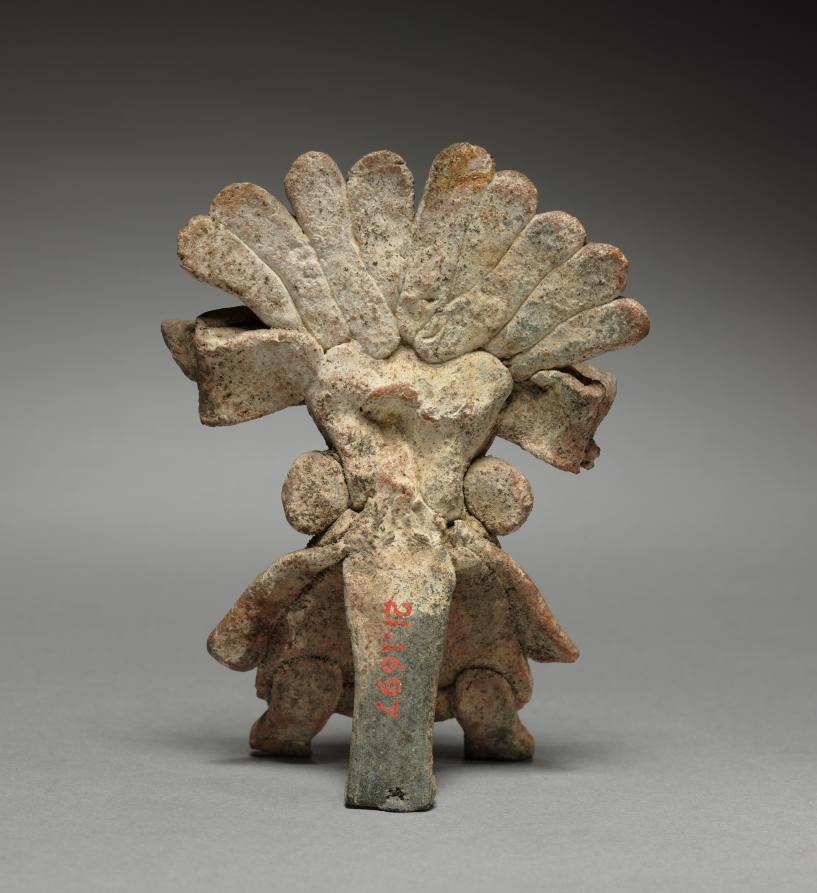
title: Figurine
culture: Mexico, Teotihuacan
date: 1–750 CE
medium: pottery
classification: Ceramic